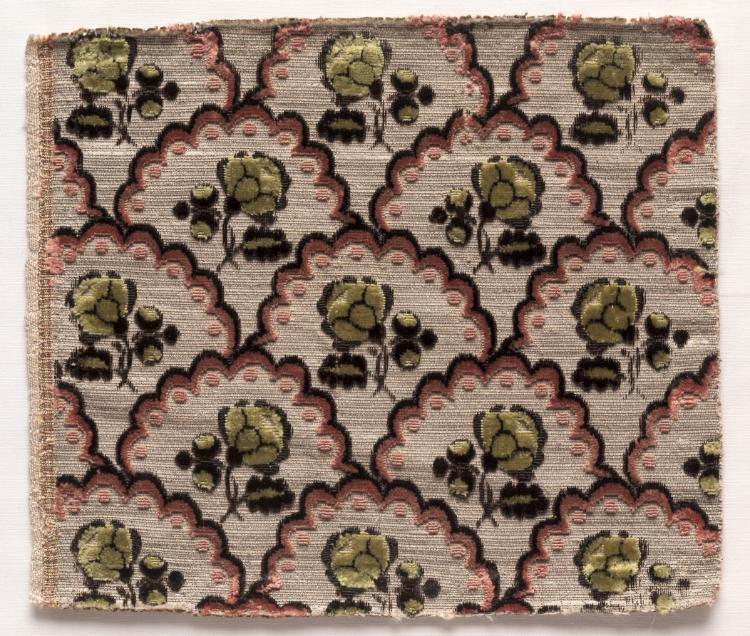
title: Textile Fragment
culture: France, late 18th century, Period of Louis XVI (1774-1793)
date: 1774–1793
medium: velvet (cut, uncut, and voided); silk and gold thread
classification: Velvet